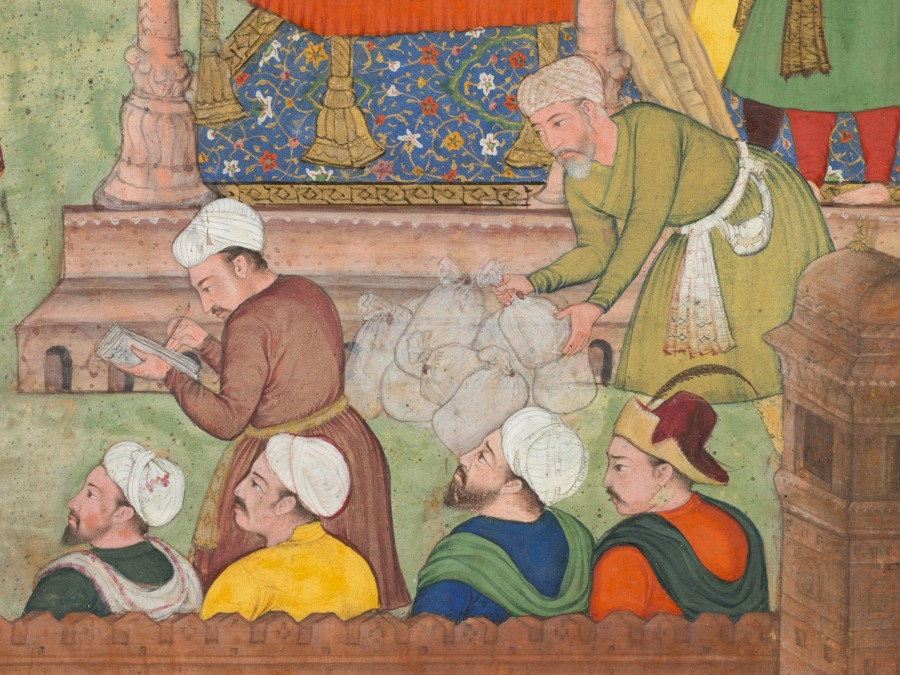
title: Babur receives booty and Humayun’s salute after the victory over Sultan Ibrahim in 1526, from an Akbar-nama (Book of Akbar) of Abu’l Fazl (Indian, 1551–1602)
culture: Mughal India, court of Akbar (reigned 1556–1605)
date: c. 1596–1597 or 1604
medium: Gum tempera and gold on paper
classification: Painting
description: The first Mughal emperor Babur sits enthroned as men bring gifts and sacks of tribute to mark a successful expansion of his territories. Emblematic of his role in leading the victory, his son Humayun wears a wine-and-gold robe of honor despite the Delhi heat in late April. Marking the royal space are a carpet and canopy painted with a lapis lazuli ground. The floral vine motif called arabesque swirls around a central lobed medallion. These delicate patterns are inspired from Persian manuscript illuminations. Contemporary historians describe awnings of gold embroidery, brocade, and velvet along with colorful carpets resembling a beautiful flower bed.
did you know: A clerk records the amount of tribute that Babur received from conquered kings.